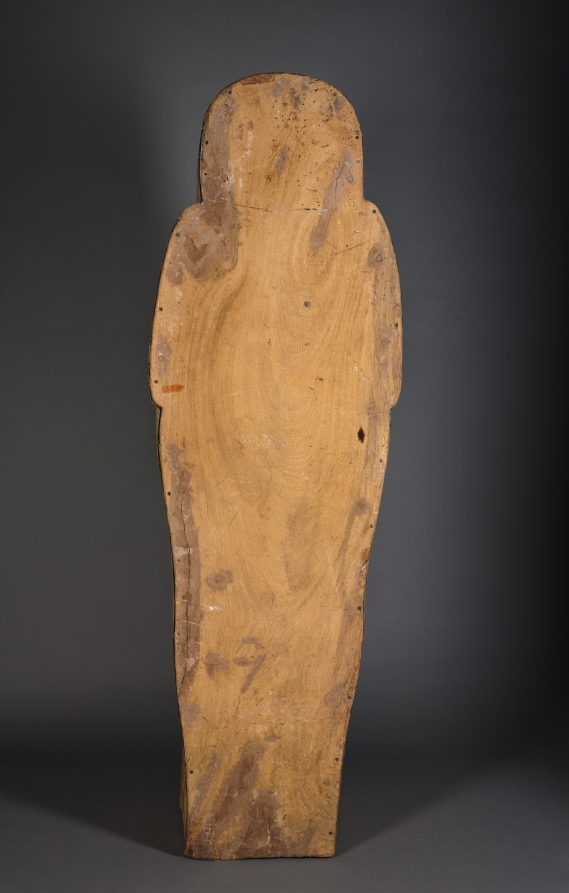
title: Coffin of Nesykhonsu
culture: Egypt, Thebes, Third Intermediate (1069–715 BCE), Dynasties 21–22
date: c. 976–889 BCE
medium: gessoed and painted sycamore fig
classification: Funerary Equipment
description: Egyptian coffins told stories and illustrated spells to help the deceased transition safely to the afterlife. Inside Nesykhonsu's coffin there are two jackals, one facing right and the other left, near the top. Here, the jackal represents the powerful deity Anubis, the god of the afterlife and embalming.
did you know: Two of Nesykhonsu's titles, "Lady of the House" and "Singer of the Choir of Mut the Great," are written on the outside of the coffin.